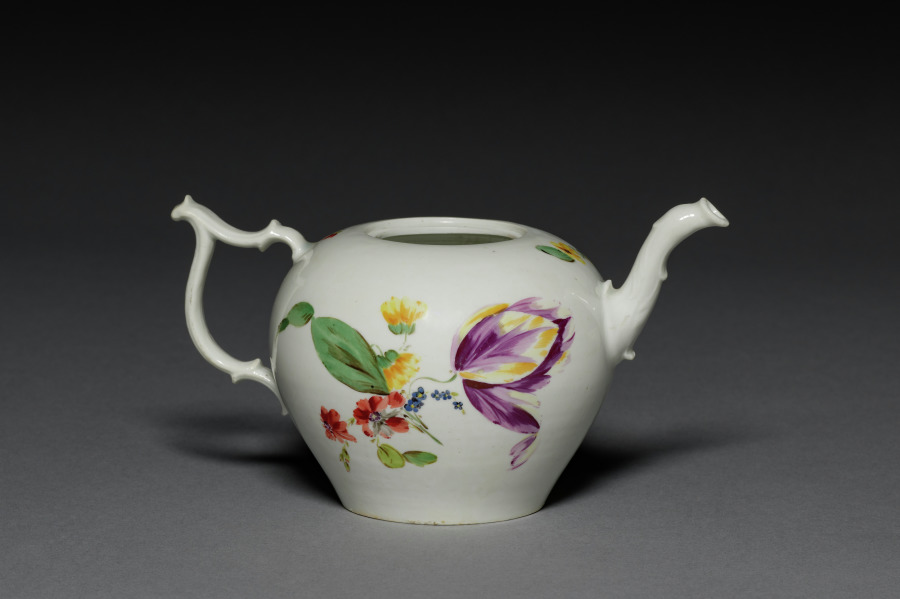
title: Teapot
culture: Germany, late 18th century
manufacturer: Kloster-Veilsdorf Porcelain Factory (German)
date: late 1700s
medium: porcelain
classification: Ceramic